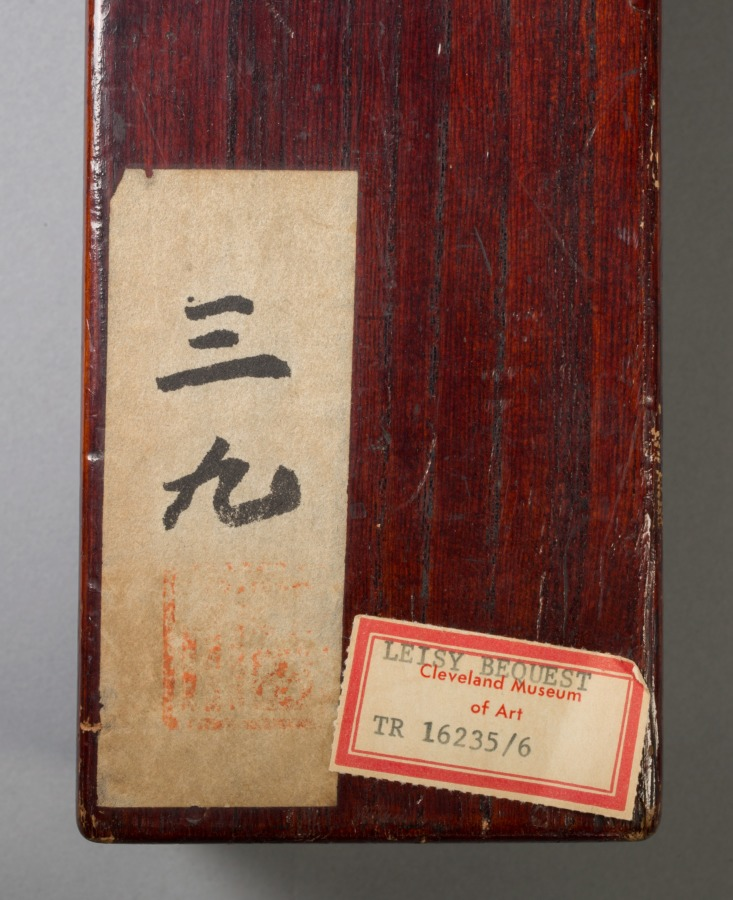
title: Wild Geese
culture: Japan, Muromachi period (1392–1573)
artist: Chōkichi (Japanese)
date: early 1500s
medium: hanging scroll; ink on paper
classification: Painting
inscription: Gourd-shaped seal of Chokichi at lower left